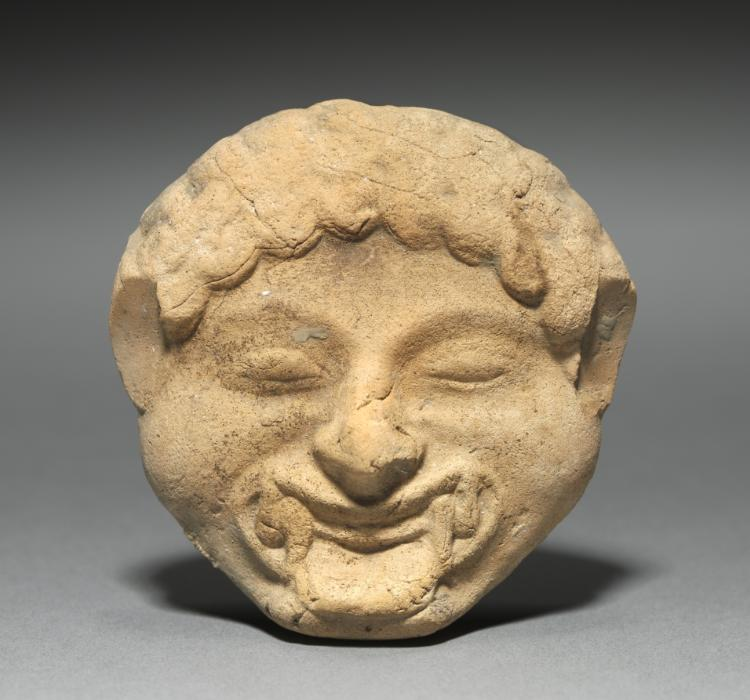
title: Gorgoneion Plaque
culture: Greece, South Italy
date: c. 525–475 BCE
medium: terracotta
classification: Sculpture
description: Probably meant to decorate the outside of a wooden coffin or other tomb furniture, this small mold-made terracotta plaque is one of two in the collection (click here for the other). Both bear gorgoneia, or frontal Gorgon faces, with snaky hair, sharp teeth, and protruding tongue, perhaps meant to ward off evils. A bit of fingerprint survives on the reverse, likely from its ancient maker.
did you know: The gorgoneion, or disembodied head of Medusa, may have served as protection against evils.